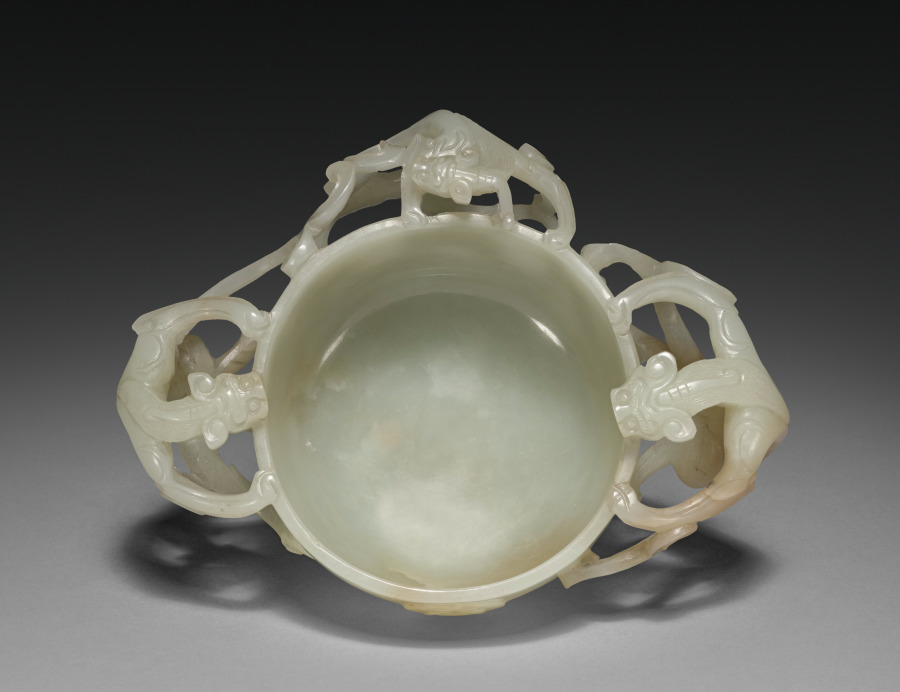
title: Cup with Dragon Handles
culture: China, Qing dynasty (1644-1911), Kangxi reign (1662-1722)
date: 1662–1722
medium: Pale gray-green white jade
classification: Jade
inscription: 萬壽長春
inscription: 壽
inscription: 子剛造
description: Three dragons, auspicious symbols for good fortune, grasp the rim of this bowl. A large shou (longevity) character is visible on the outside wall. Drinking cups with dragon handles were elite luxuries. The yellowish-white color and refined techniques are characteristic of Suzhou workshops that served the court, scholar-officials, and the merchant class. The optimistic attribution to Lu Zigang (late 1500s), a jade master recorded to have been active in Suzhou, suggests that its maker used the master’s name to attract wealthy clients eager to demonstrate their refined taste and connoisseurship.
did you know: Auspicious inscriptions on the base and front of the jade cup convey wishes for longevity.